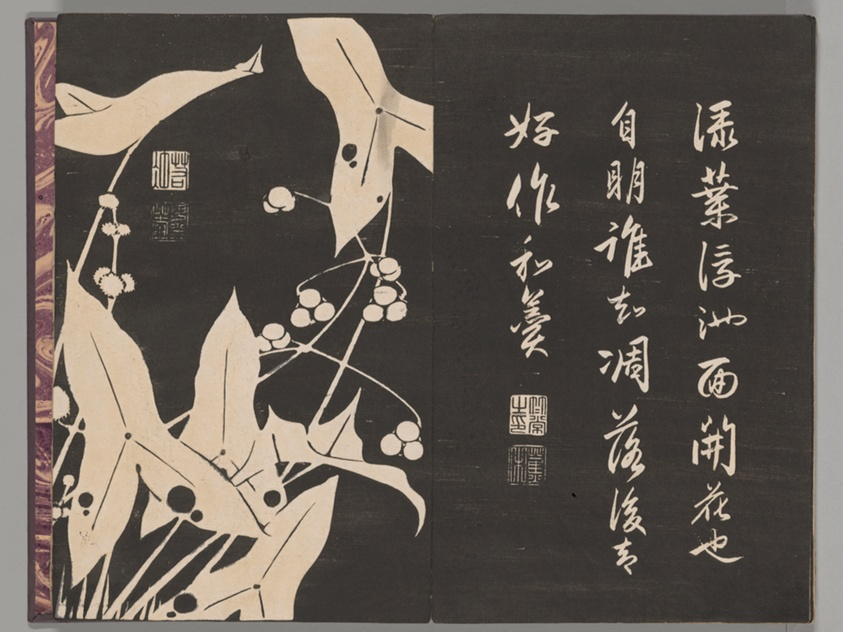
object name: Book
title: Soken sekisatsu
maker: Ito Jakuchu (Japanese, 1716-1800)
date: 1767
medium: Woodblock printed book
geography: Japan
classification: book